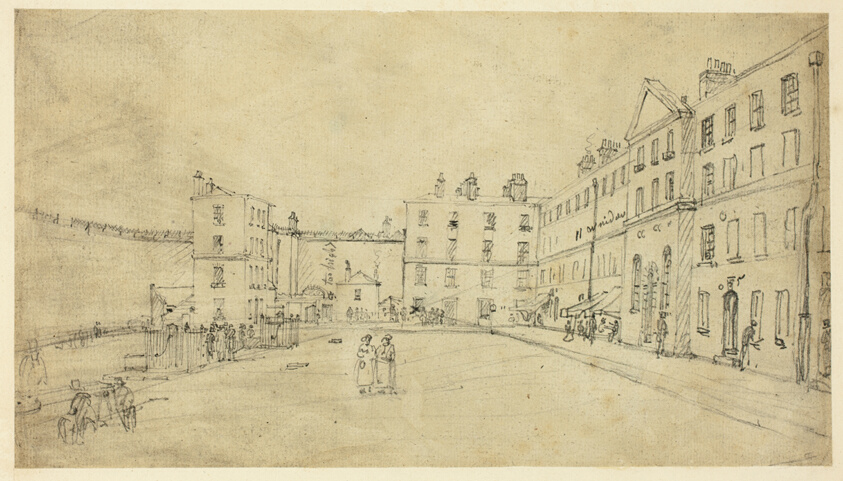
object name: Drawing and Watercolor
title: Study for King's Bench Prison, from Microcosm of London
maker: Augustus Charles Pugin (English, born France, 1762-1832); Thomas Rowlandson (English, 1756-1827)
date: c. 1808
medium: Graphite on cream wove paper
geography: England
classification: graphite; drawings (visual works); prints and drawing